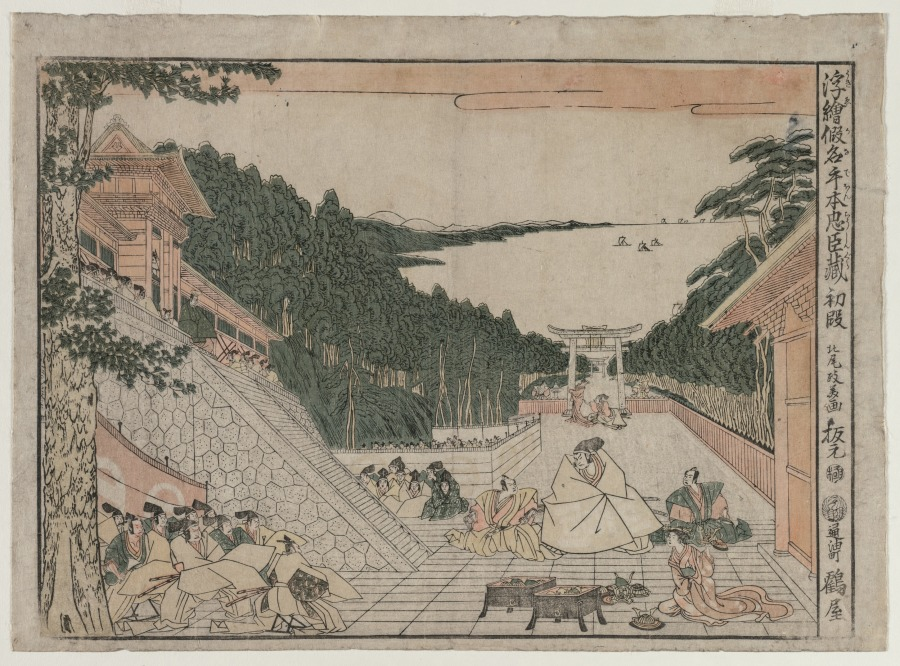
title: Perspective Pictures for The Treasure House of Loyalty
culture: Japan, Edo period (1615–1868)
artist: Kitao Masayoshi (Japanese, 1761–1824)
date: c. 1790s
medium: color woodblock print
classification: Print